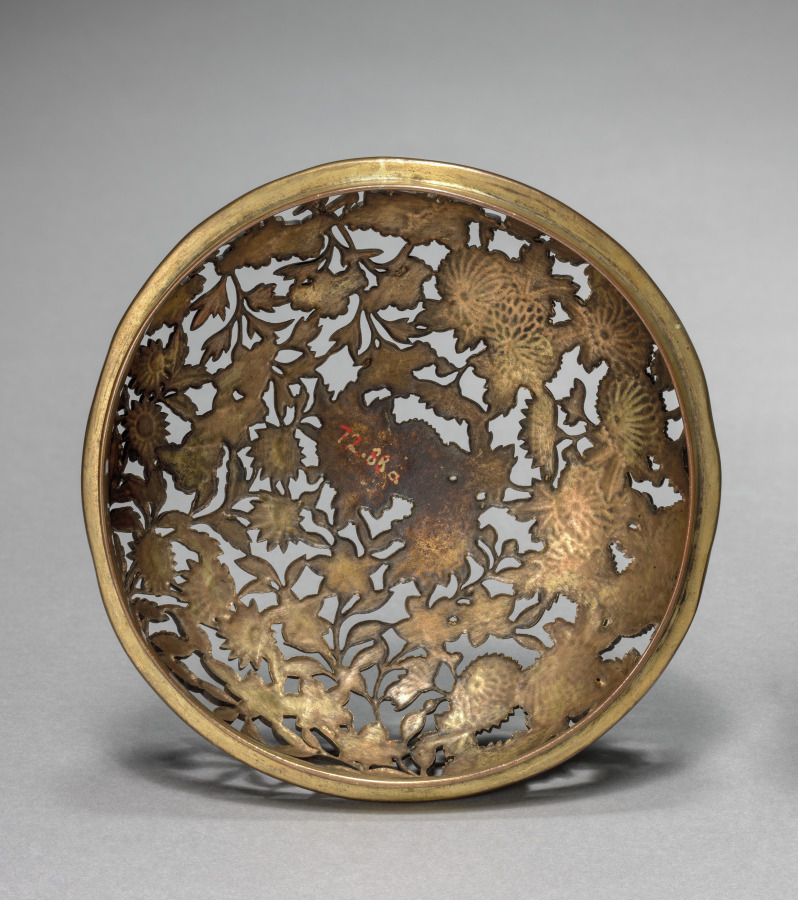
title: Cover for Incense Burner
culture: Japan, Meiji period (1868–1912)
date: late 1800s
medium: Gilt bronze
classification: Ceramic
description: This incense burner emulates Chinese porcelain in its glaze and form. A number of prominent ceramicists of the Meiji period explored classical Chinese forms and glazes, even as they also produced stoneware with Japanese-style glazes.